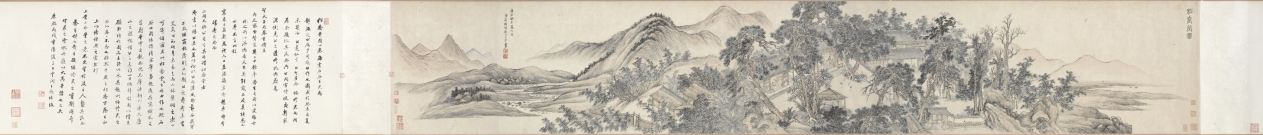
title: Hall of Lofty Pines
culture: China, Qing dynasty (1644-1911)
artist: Wang Hui (Chinese, 1632–1717)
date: 1703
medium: handscroll; ink and color on paper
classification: Painting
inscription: [題] 松喬堂圖 康熙癸未夏六月, 海虞耕煙散人王翬畫。[印]王翬之印; 石谷. [左下] 來青閣; 耕煙野老時年七十有二.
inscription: 松喬堂圖一卷，海虞石谷王君為靜海近公厲少司冦公作也。圖成于癸未之夏。未幾而公遂仙去。公令子今編修君南湖屬余題跋其後。余與公同官侍從，交契最深。側見公之清修純德，蔚為聖天子所眷重。侍直內廷，密勿贊襄，幾二十餘年。蒼生之所以受賜，士林之所以沐德者，天下莫能窺，在廷莫能悉。而公卒不言。以故宸衷日益契，恩禮亦日益渥。雖年逾懸車，時有歸老之念。而上固不聼公之去。其所謂松喬堂者，御書以賜公者也。蓋以松比公之清風勁節，而歲寒不改，經霜彌茂。則又以期公之壽考未有艾焉。公知此身未易乞，而山林槃磵之樂，止可寄諸寤思。此松喬堂圖之所由作也歟。石谷此圖，結構精密，筆墨超邁。其寫樹木之蒼蔚，堂宇之靚幽。恍見摩詰輞川樂天廬山之勝。獨惜公未得一日徜徉故園以償其願。即繪於圖亦未得以永其趣，此編修君之所以眷眷不忘也。雖然千歳之松喬，下蔭百畝，上以修棟梁之需。然則上當日名堂之意，不更望於後之人襲其芘而養其材也哉。吾願編修君之寶斯圖。并望君之塗塈丹雘，大其堂構也已矣。 康熈丙戍重陽三日，雲間王鴻緒跋。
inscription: 10 additional seals: 1 seal of Li Duna 勵杜納 (1628–1703); 4 seals of Zha Ying 查瑩 (jinshi of 1766); 5 seals of Li Yun (dates unknown).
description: Wang Hui 王翬, a leading painter in the orthodox school of the early Qing dynasty (1644–1911), was commissioned to paint this landscape with a country estate for Li Duna 勵杜納 (1628–1703), vice minister of justice in Emperor Kangxi’s court. The emperor had honored Li by granting him a piece of calligraphy with the name of Li’s retirement retreat, “Hall of Lofty Pines.” He drew a comparison between pines and Li’s upright character, resilience, and longevity. Wang Hui’s painting was supposed to allow Li to imagine living in a beautiful, secluded compound among the hills and pines. Sadly, Li died before seeing the completed painting and before receiving the emperor’s permission to retire. The landscape begins with peaceful riverbanks and low hills. The pines around the estate in the middle of the handscroll are truly lofty, some stretching even beyond the frame of the painting. Li Duna, the estate’s owner, is shown twice in his serene mountain retreat: first approaching the entrance to the compound with two servants at the right, and then later in the scroll, to the left, reading in the comfort of an inner room.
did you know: One servant carries the estate owner's carefully wrapped qin, a type of zither.